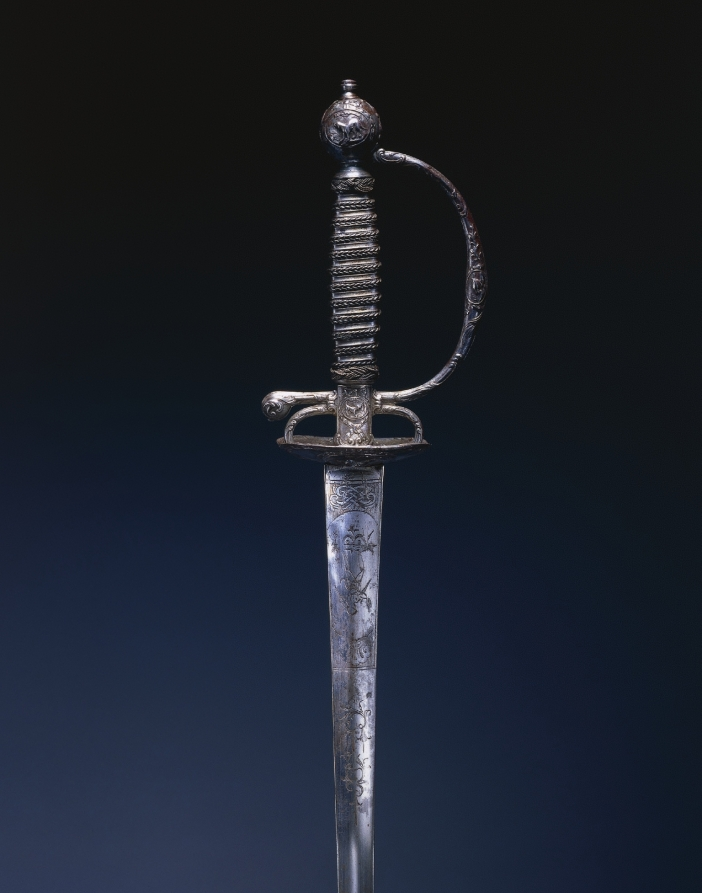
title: Small Sword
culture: France, 18th century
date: c.1770–80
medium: steel; chiseled relief decoration; blade engraved; wire grip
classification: Arms and Armor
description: During the 1700s, the small-sword emerged as a light, quick weapon. Like the rapier it was carried by unarmored civilians, the noblemen of the upper classes. Over time this delicate sword became more an accessory of male attire than a weapon essential to life and death. The sword hilt, which shows even when the blade is sheathed, became the ground for elaborate decoration. These small-swords thus represent the final stage in the evolution of the sword, from the edged weapons of antiquity to the elegantly refined blades of the 1700s and 1800s.